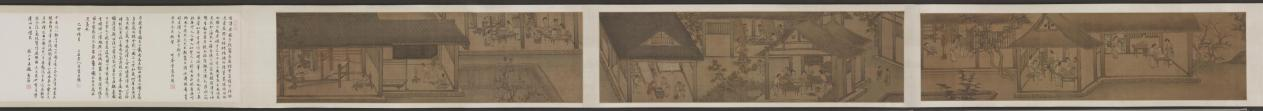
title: Sericulture (The Process of Making Silk)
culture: China, Southern Song dynasty (1127-1279)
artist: attributed to Liang Kai (Chinese, mid-1100s–early 1200s)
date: early 1200s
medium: Handscroll; ink and color on silk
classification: Painting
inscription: 3 colophons and 7 seals of Ch'eng Ch'i (20th c.).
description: By the Southern Song period, the economic center of the silk industry had shifted to the lower Yangzi delta, while the north continued to be troubled by wars. Divided into three sections, the handscroll illustrates 14 steps in the process of making silk, from the raising of silkworms to the weaving of silk cloth. The scroll’s scenes follow the illustrations of Lou Shou’s (1090–1162) Pictures of Tilling and Weaving (gengzhi tu), the first recorded painting of this genre, which was conceived in Hangzhou around 1145. However, in the Cleveland painting the artist groups several scenes of sericulture together under the roof of an open structure.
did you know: The painting is attributed to Liang Kai, a court artist active from about 1201 to 1204 at the Imperial Painting Academy in the city of Hangzhou, a major silk weaving center from that time to the present day.